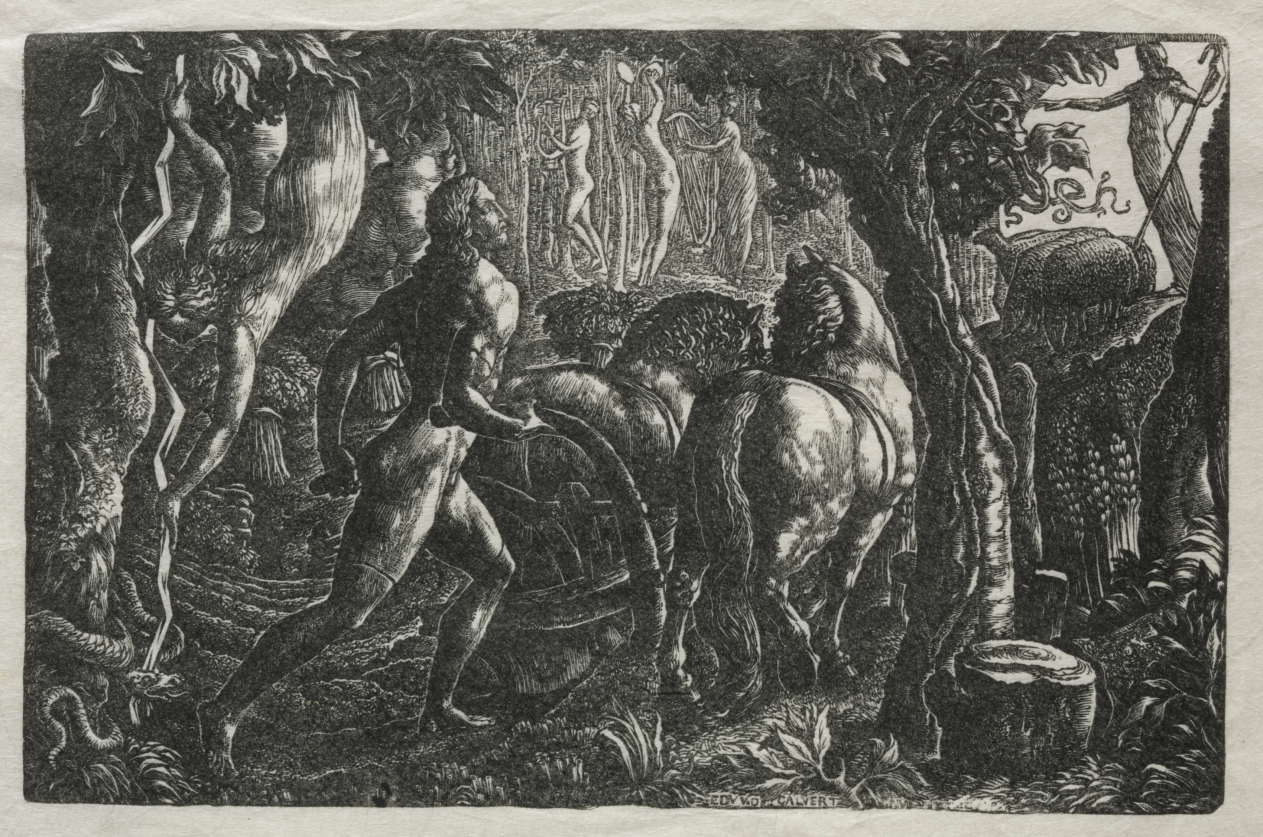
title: The Ploughman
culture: England, 19th century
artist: Edward Calvert (British, 1799–1883)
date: 1829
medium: wood engraving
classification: Print